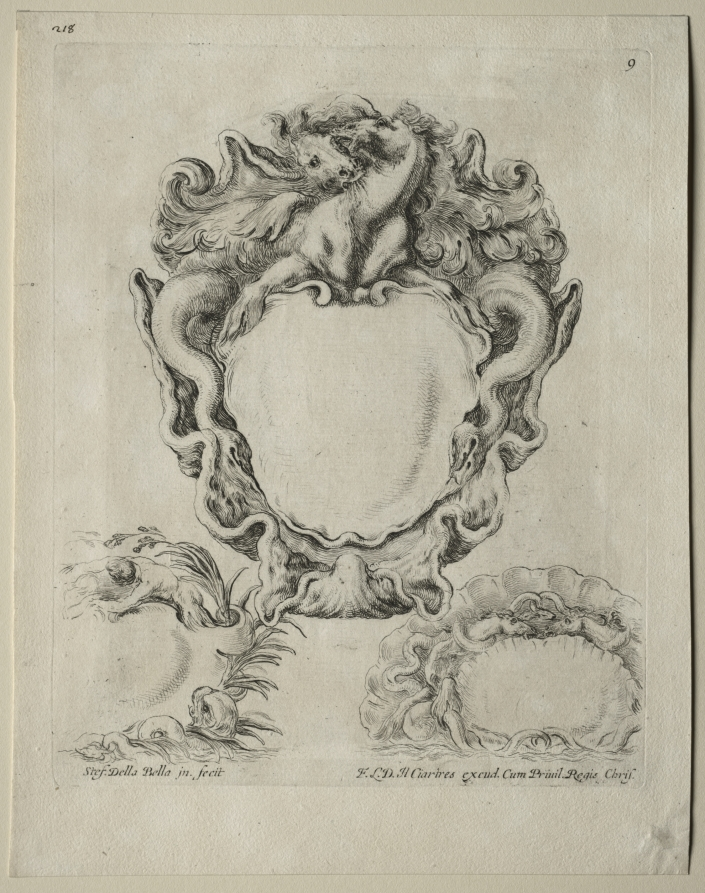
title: Collection of Various Caprices and New Designs of Cartouches and Ornaments: No. 9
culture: Italy, 17th century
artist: Stefano Della Bella (Italian, 1610–1664)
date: 1646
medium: etching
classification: Print